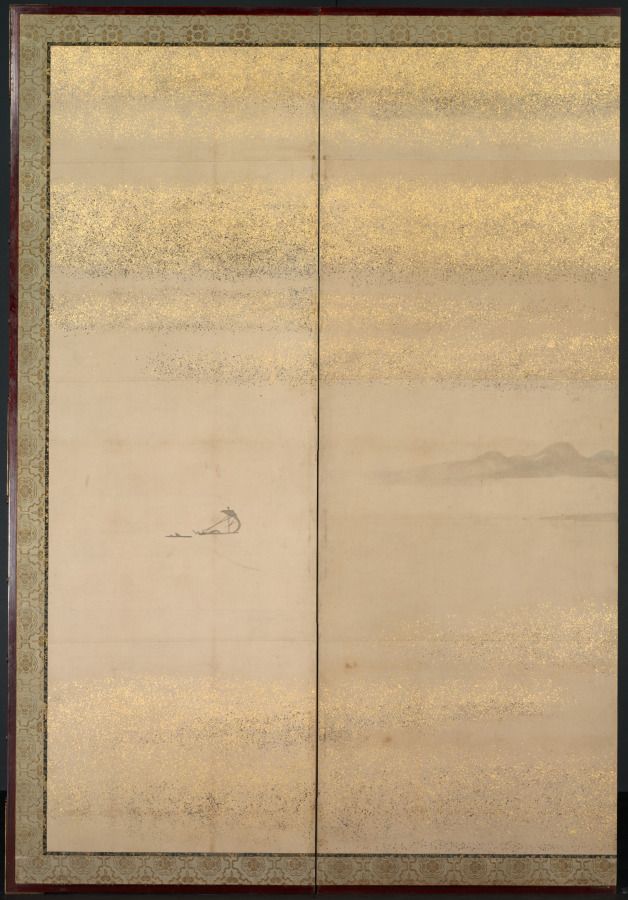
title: Summer and Winter Landscapes (one of a pair)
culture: Japan, Edo period (1615–1868)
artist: Kano Naonobu (Japanese, 1607–1650)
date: 1600s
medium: six-panel folding screen; ink on gold- and silver-decorated paper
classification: Painting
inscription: signed: "Jitekisai Naonobu"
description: This sparse composition depicts a summer scene on the right and a winter scene on the left. Careful observation reveals that the pair of screens was once damaged, and a later conservation including new sections of paper and inpainting sought to preserve the original flavor of the paintings so they could continue to be appreciated. Kano Naonobu was born in Kyoto, the younger brother of major painter and authenticator Kano Tan’yū (1602–1674). He relocated to Edo (present-day Tokyo) at the behest of the Tokugawa government in 1630 where he worked with his brother and teacher. In Kyoto, he helped his brother with paintings for Nijō Castle and the major Pure Land Buddhist temple Chion’in.